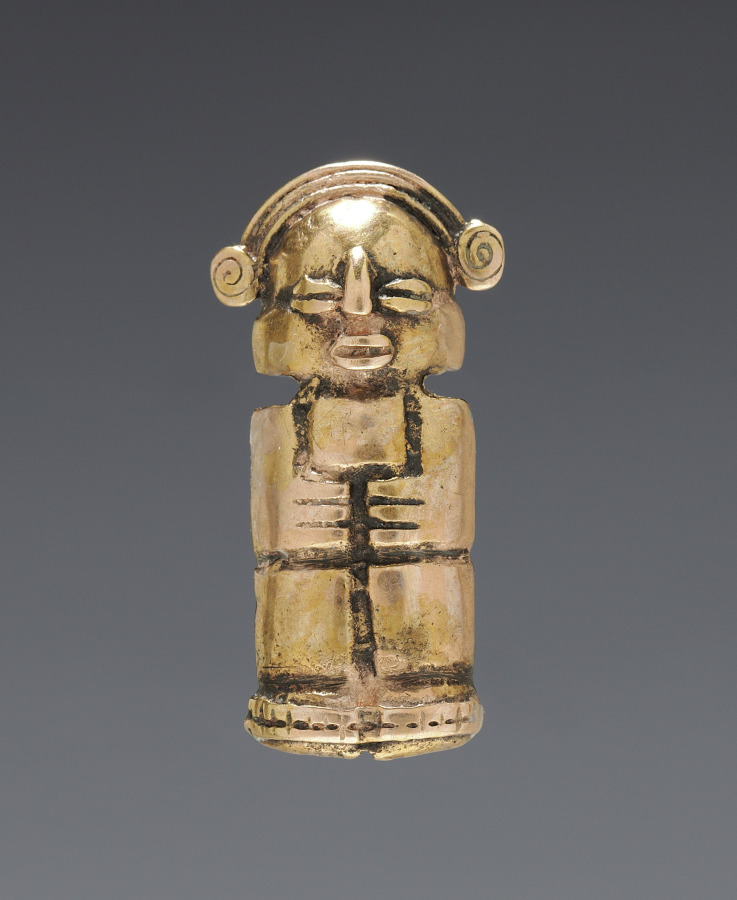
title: Necklace Figurine Bead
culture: Colombia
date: 1–700 CE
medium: cast gold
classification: Jewelry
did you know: Working with gold dates back to at least 500 BC in Ecuador and Colombia.